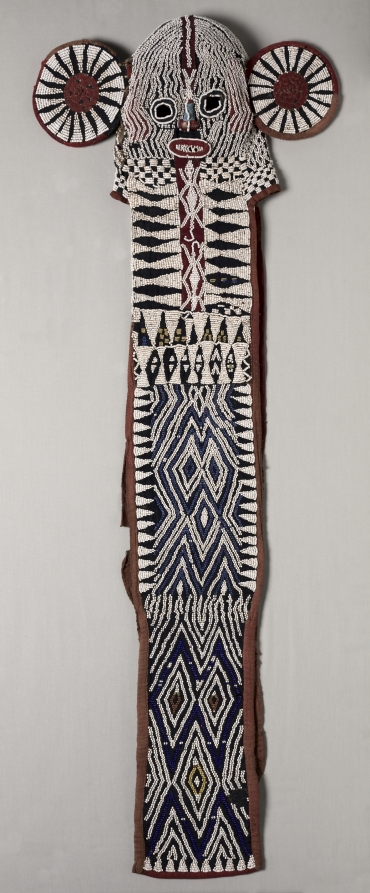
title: Mask (mbap mteng): Elephant (aka)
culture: Africa, Central Africa, Cameroon, Grassfields region, Bamileke-style maker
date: early 1900s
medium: Cotton, burlap, glass beads, twine, leather, and wood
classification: Mask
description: The name given to masks like this, mbap mteng, means "animal with huge ears." In the Cameroon Grassfields kingdoms, the elephant signifies power, authority, prestige, and leadership. The colorful glass beads that decorate the mask’s surface were imported from Venice and Bohemia (in Europe) and signal wealth and prosperity. Its geometric patterns include triangles that evoke the leopard, another animal linked with royal power. Members of Kuosi, an elite male society, wore such elephant masks for ritual dances and funerary ceremonies. This mask would have been worn with a costume that included a feather headdress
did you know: Performers wore elephant masks with indigo-dyed robes, red feather headdresses, and leopard pelts. Leopards and elephants symbolized royal power.